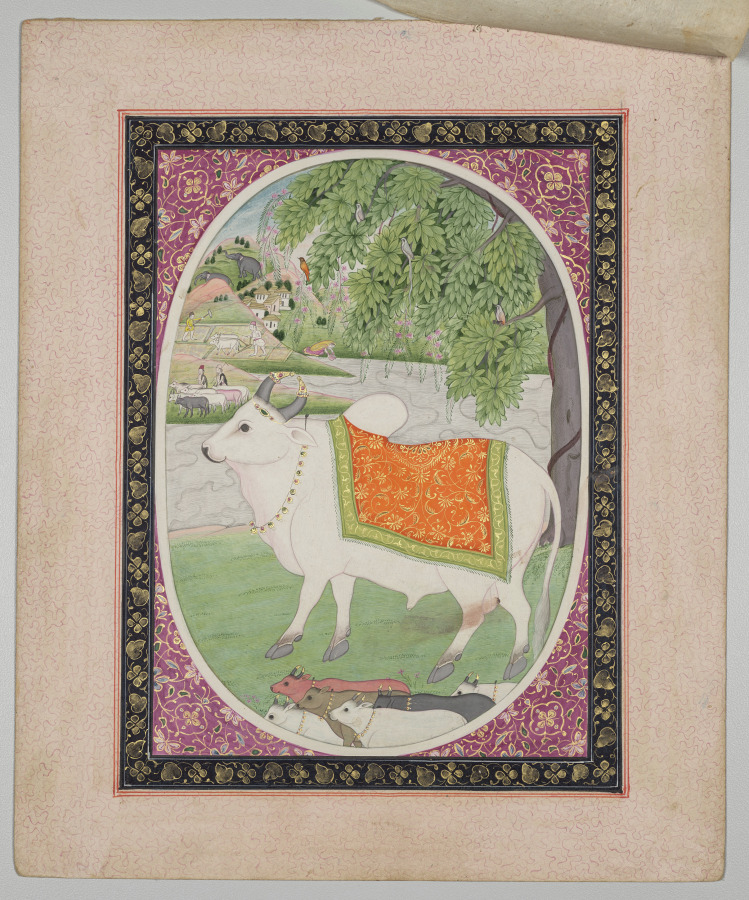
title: Taurus, from a "Mandi Astrology Series"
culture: Northern India, Pahari kingdoms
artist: attributed to Sanju (Indian, active late 1700s–early 1800s)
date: c. 1810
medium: Gum tempera and gold on paper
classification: Painting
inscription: The attached flysheet has a number, verse, and the stamp of the Mandi Royal Library, filled with the number 1296. The series number is 63, with the verse is number 2.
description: Standing for the astrological sign Taurus, the large-scale bull fills the space like a graceful icon behind a much smaller herd of cows. Pure white in color and in perfect profile, he has been adorned with a string of bells, a jeweled diadem, and decorative tips on his horns. A fine textile with gold leafy arabesque patterns sets him apart from oxen, dairy cows, and even the elephants in the distant background.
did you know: The oval format derives from the popularity of British cameos at the Mughal court.